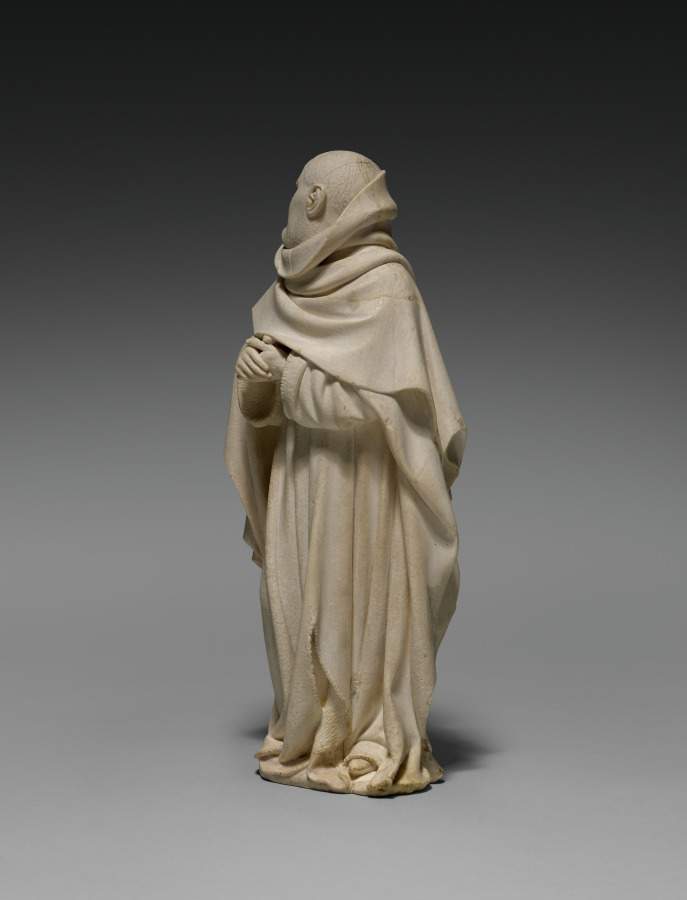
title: Mourner from the Tomb of Philip the Bold, Duke of Burgundy (1364–1404)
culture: Netherlands, active Dijon, 15th century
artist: Claus de Werve (Netherlandish, 1380–1439)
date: 1404–10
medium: vizille alabaster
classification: Sculpture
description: This figure comes from the tomb of Duke Philip the Bold from the church of Champmol near Dijon (Burgundy, France). Philip, who founded the monastery and designated it as his burial place, hired the best artists, many of whom came from the Netherlands. While the commission was given in 1381, the work was not completed until 1410, six years after the duke’s death. This mourner is unusual for the time because it is not carved as a static low relief on the pedestal of the tomb but interact with the viewers and their fellow procession members. The lifelike quality of the figure is due in large part to the alabaster. Its softness allowed artists to carve details into the material, and the transparent, milky white stone could also be polished to a high gloss.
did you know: The use of alabaster in the late Middle Ages began in the 1300s with court art in the circles of French kings, especially in the field of funerary sculpture.